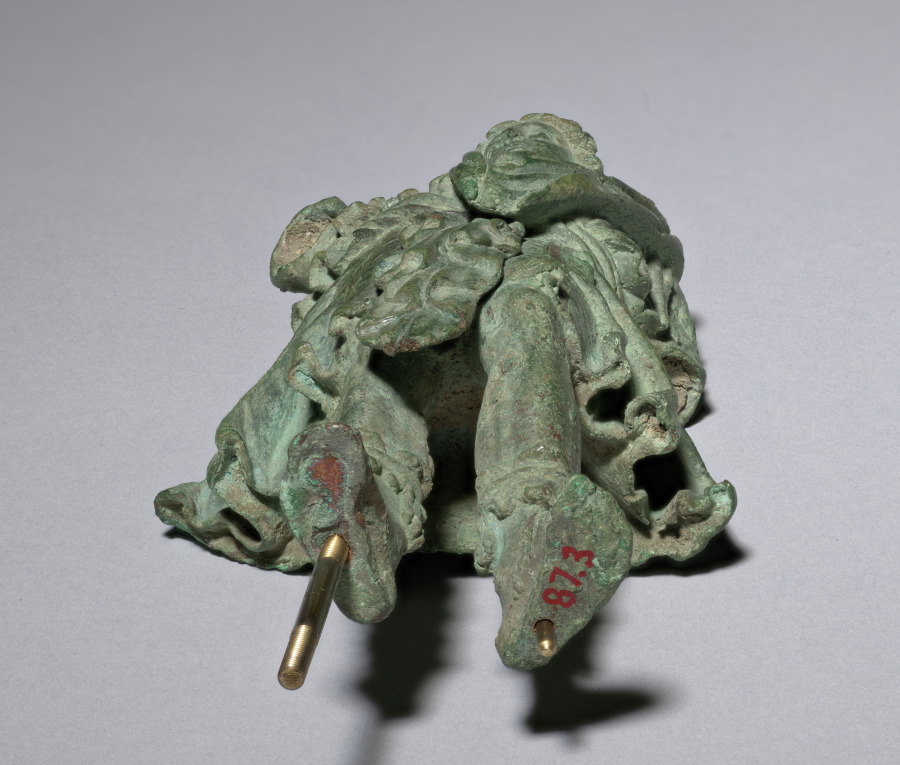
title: Lar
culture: Italy, Rome, Early Imperial period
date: 1–25 CE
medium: bronze with copper inlays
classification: Sculpture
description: This youthful bronze figure wears a short tunic with copper inlaid stripes and open-toed boots with animal-skin liners. The figure’s arms are missing, but based on other surviving examples, they likely held a libation dish and cornucopia. Even without these attributes, the figure can be identified through dress and stance as a type of Lar, or domestic deity, known as the Lar Familiaris (Household Lar), standing in a characteristic "quiet pose." Other types of Lares include the Lares Compitales and Lares Augusti (Lares of crossroads and of Augustus, respectively).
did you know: This statuette likely stood with other small bronzes in a household shrine called a lararium.